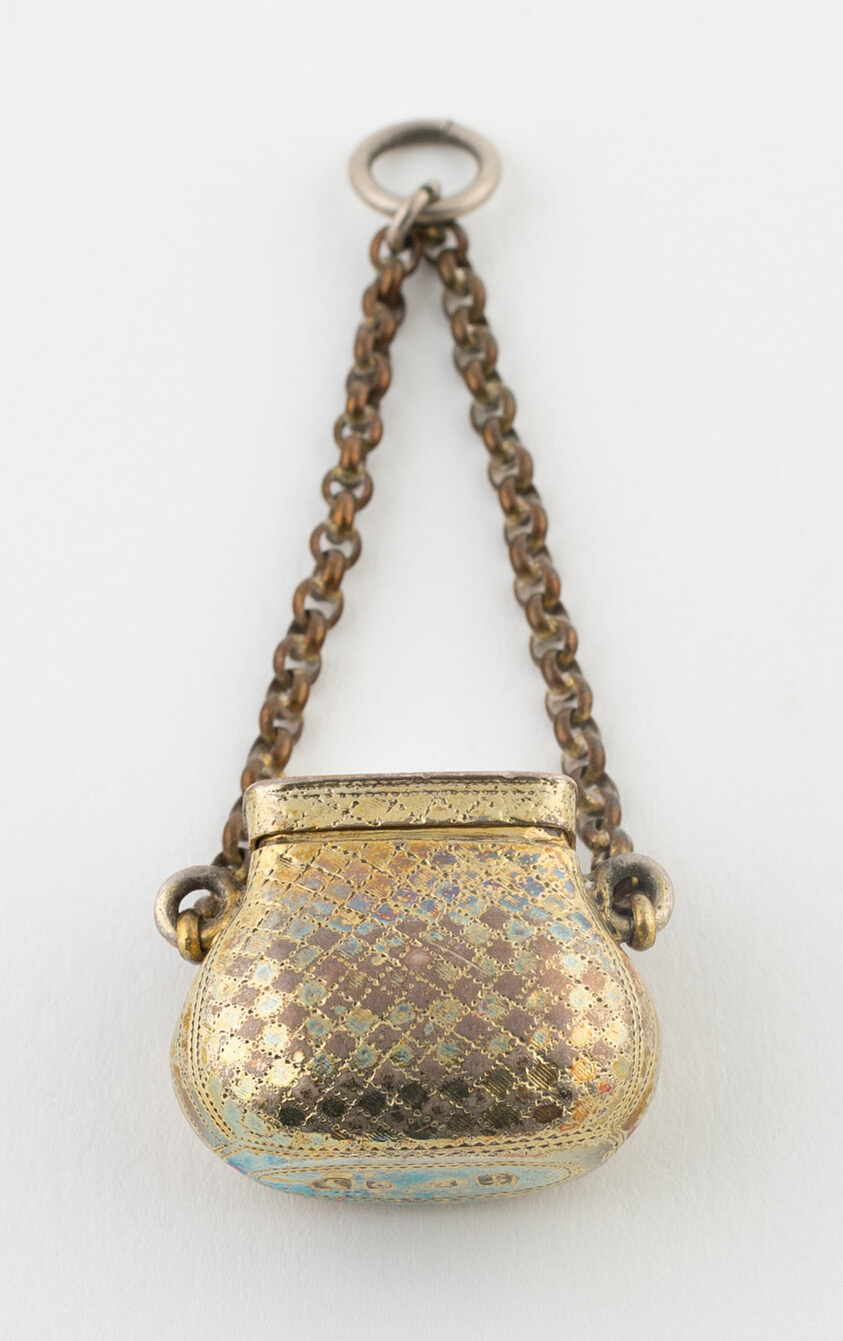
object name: Metalwork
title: Purse-Shaped Vinaigrette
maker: Birmingham, England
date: 1822/23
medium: Silver gilt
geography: Birmingham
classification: vinaigrette (container for health care); container for personal use; box; european decorative arts; metalwork; silver; decorative object/ornament